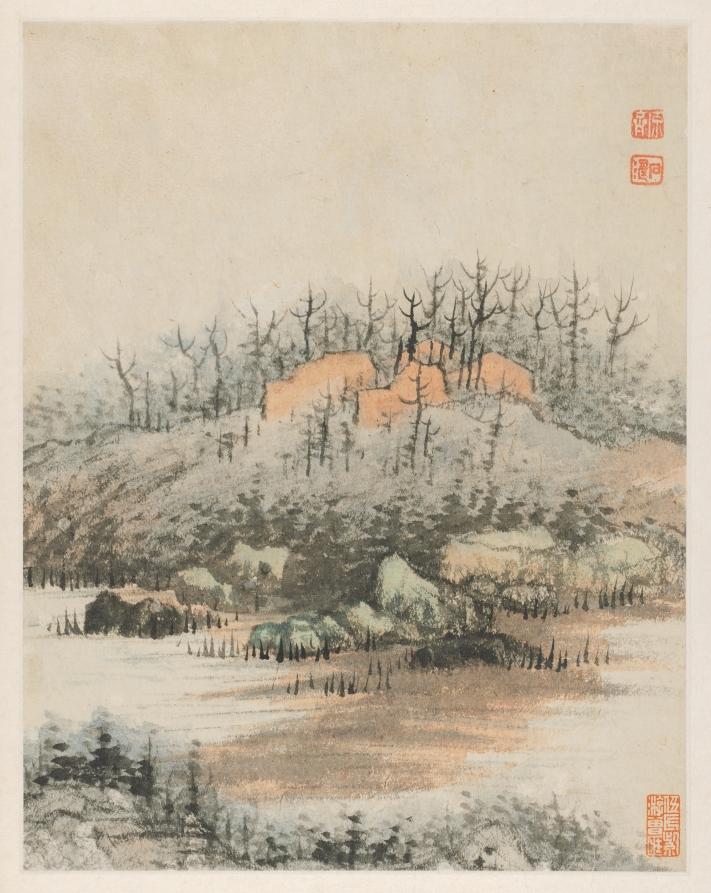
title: Reminiscences of Qinhuai River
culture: China, Qing dynasty (1644-1911)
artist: Shitao (Chinese, 1642–1707)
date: 1642–1707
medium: album leaf, ink and color on Song paper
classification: Painting